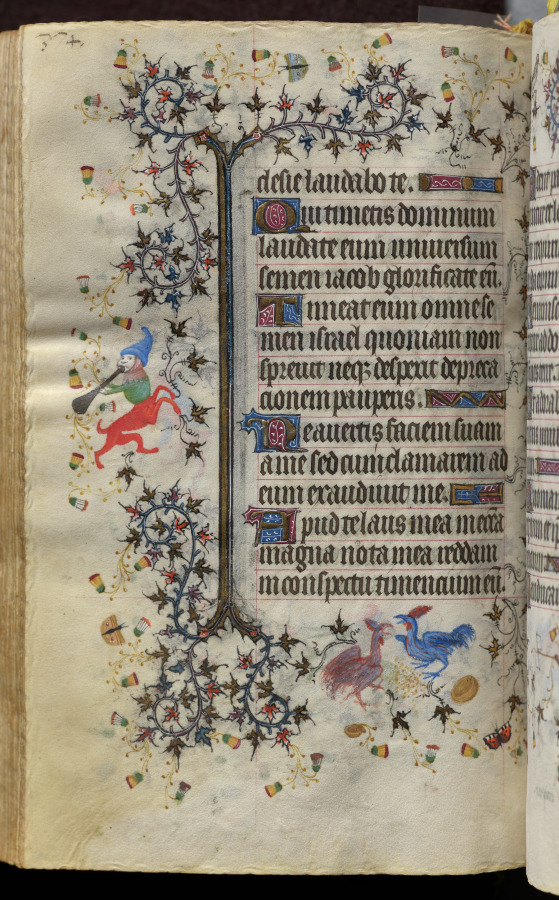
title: Hours of Charles the Noble, King of Navarre (1361-1425): fol. 182v, Text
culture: France, Paris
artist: Master of the Brussels Initials and Associates (French)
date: c. 1405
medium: ink, tempera, and gold on vellum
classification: Bound Volume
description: This precious volume was obviously highly prized by its owner, the French-born King of Navarre, who had his coat of arms painted on no less than twenty folios. Rather than directly commissioning this manuscript from a specific workshop, it seems that Charles the Noble acquired his book of hours -- perhaps ready-made for the luxury market -- while on a trip to Paris in 1404-05. A collaborative effort, six painting styles are evidenced within the pages of this codex, those of two Italians, two Frenchmen, and two Netherlanders. The painter who was responsible for the planning and decoration of the book, and who produced seventeen of the large miniatures, was a Bolognese artist known as the Master of the Brussels Initials. His principal assistant, responsible for most of the borders, was a Florentine who signed his name "Zecho" da Firenze on folio 208 verso.